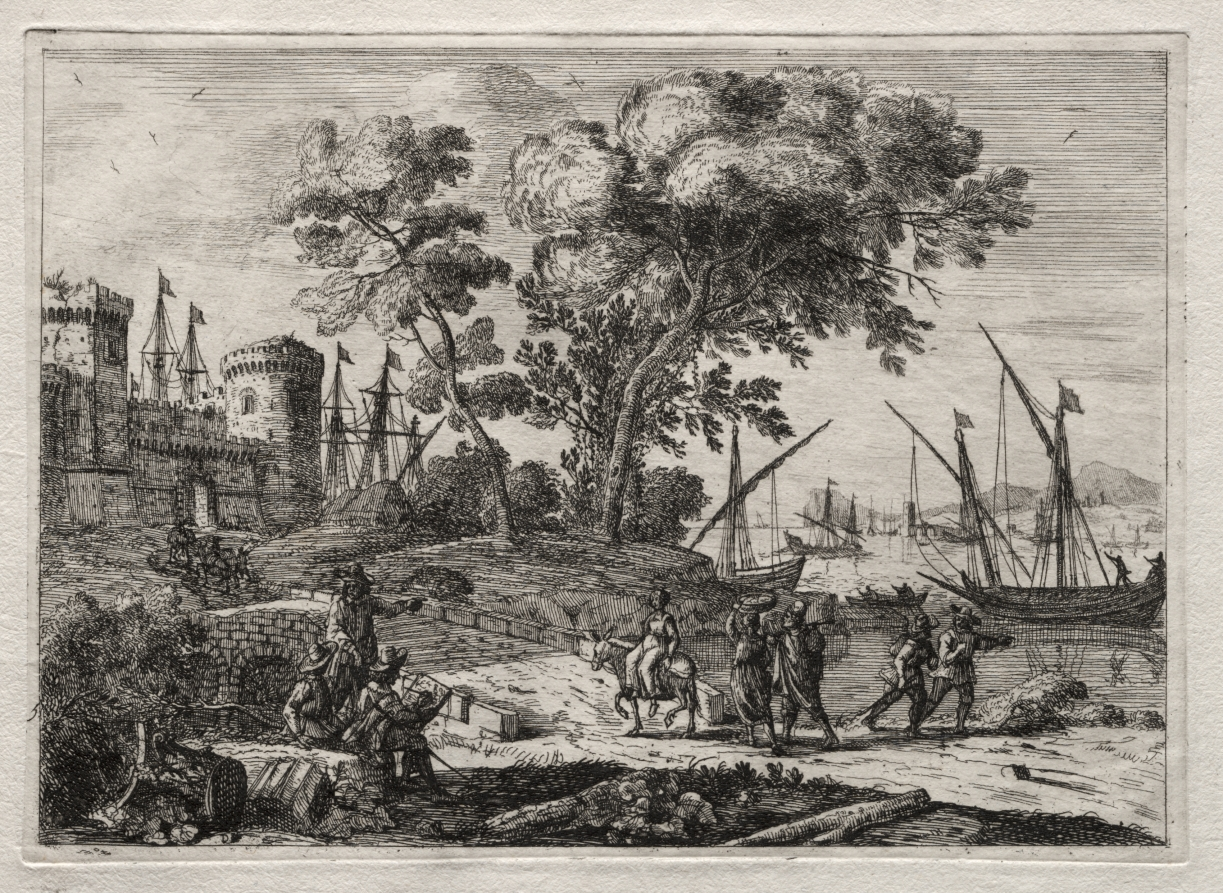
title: The Draughtsman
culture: France, 17th century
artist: Claude Lorrain (French, 1604–1682)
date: c. 1630–60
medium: etching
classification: Print